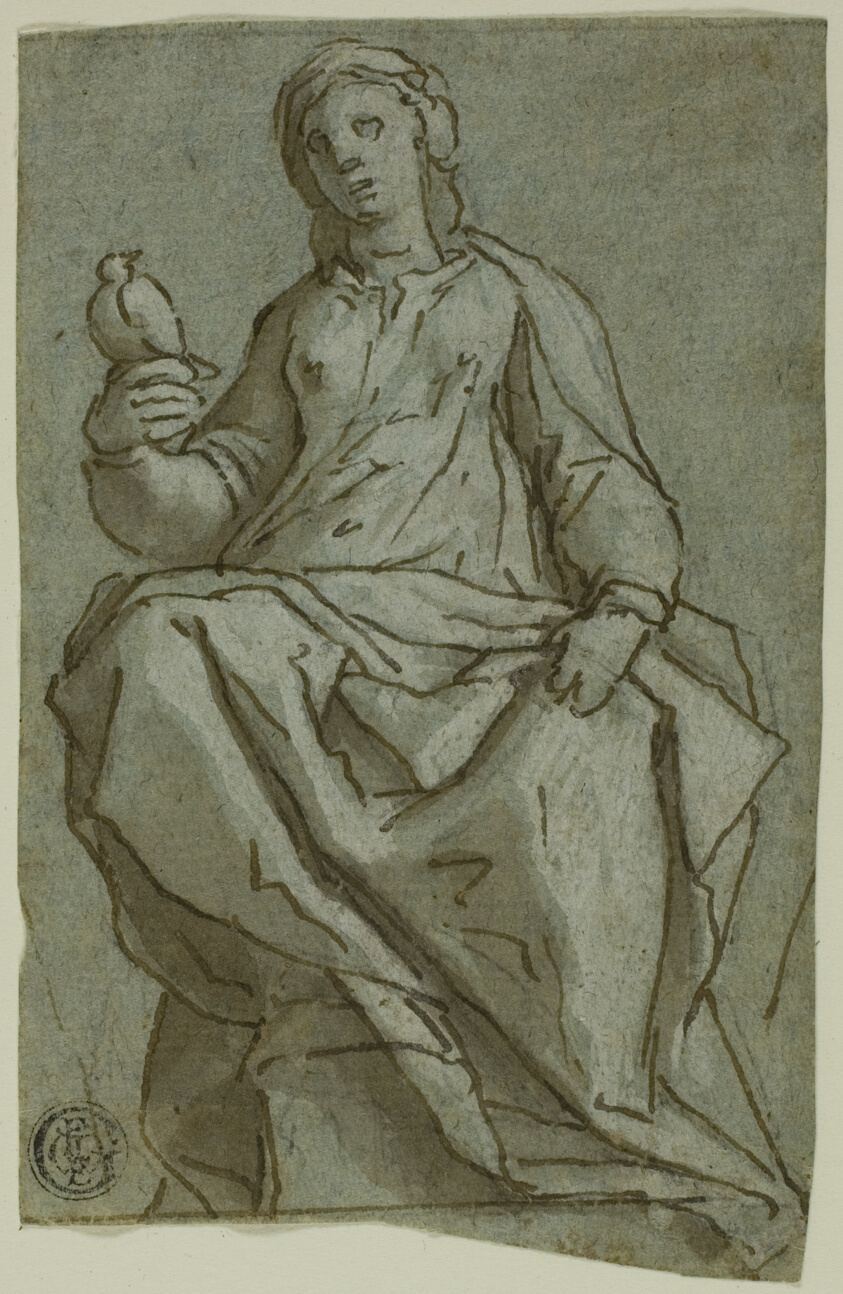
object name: Drawing and Watercolor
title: Seated Female Figure (Saint Scholastica?) Holding a Dove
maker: Lazzaro Tavarone (Italian, 1556-1641)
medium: Pen and brown ink with brush and brown wash, heightened with white, over traces of black chalk, on blue laid paper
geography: Italy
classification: ink with wash; drawings (visual works); prints and drawing